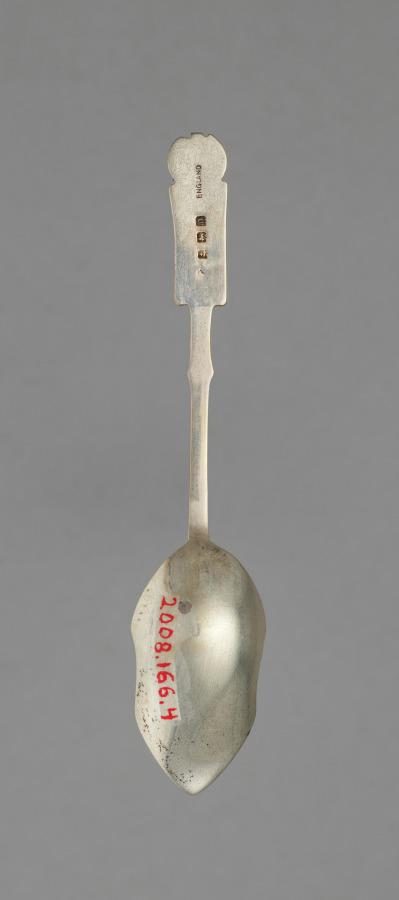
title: Set of six Spoons in Original Box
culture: England, London, 19th century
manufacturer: Liberty and Company (British)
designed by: attributed to Archibald Knox (British, 1864–1933)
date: c. 1895–1910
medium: Silver, enamel decoration and leather box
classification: Silver